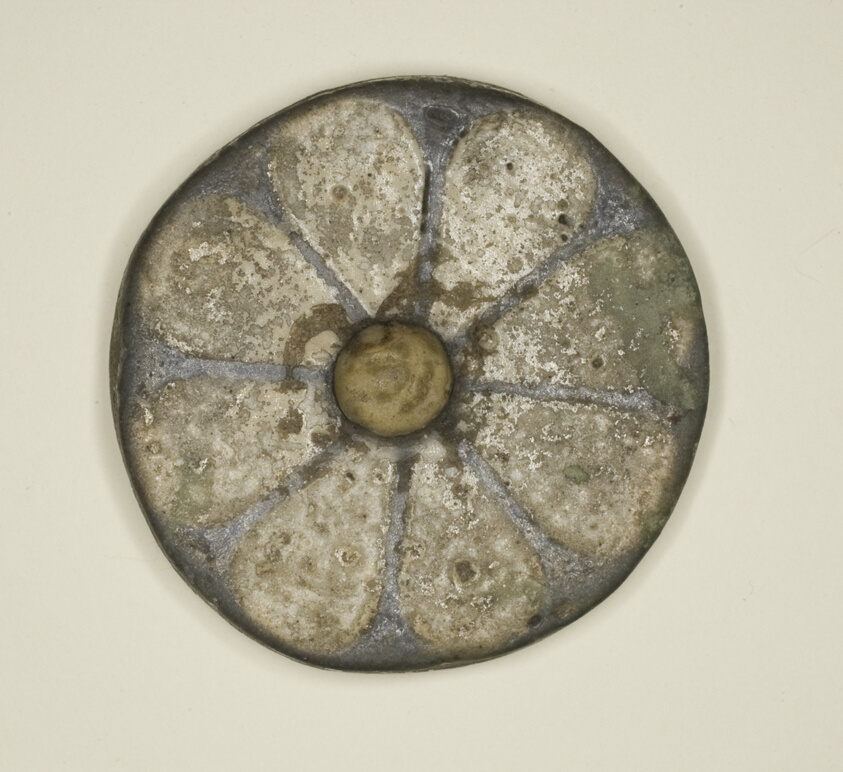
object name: Decorative Arts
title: Rosette from the Temple of Ramesses III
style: new kingdom, egyptian, ancient, ramesside period, twentieth dynasty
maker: Egyptian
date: New Kingdom, Dynasty 20 (about 1186–1069 BCE)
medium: Faience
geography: Egypt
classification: inlay; ceramics; ancient art; decorative arts; faïence (composite material)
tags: flowers